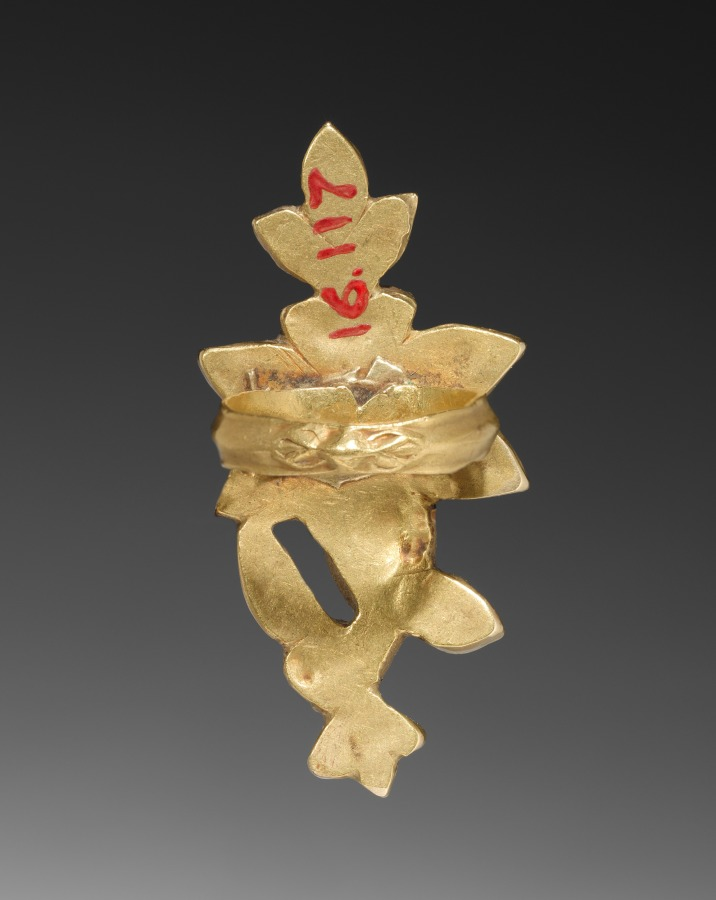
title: Ring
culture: Burma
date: 1800s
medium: gold, turquoise and rubies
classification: Jewelry